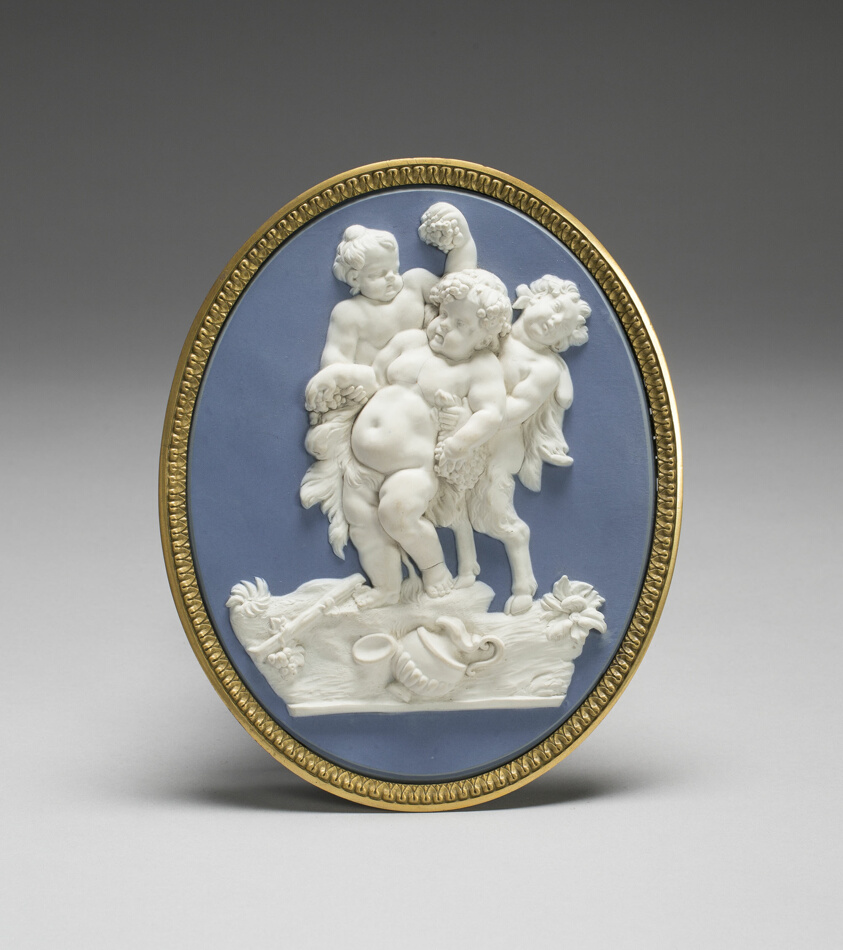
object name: Ceramics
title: Bacchus and Two Fawns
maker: Wedgwood Manufactory; England, founded 1759; Etruria, Staffordshire, England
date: c. 1775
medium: Stoneware (jasperware)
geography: Burslem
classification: sculpture; stoneware; european decorative arts; ceramics